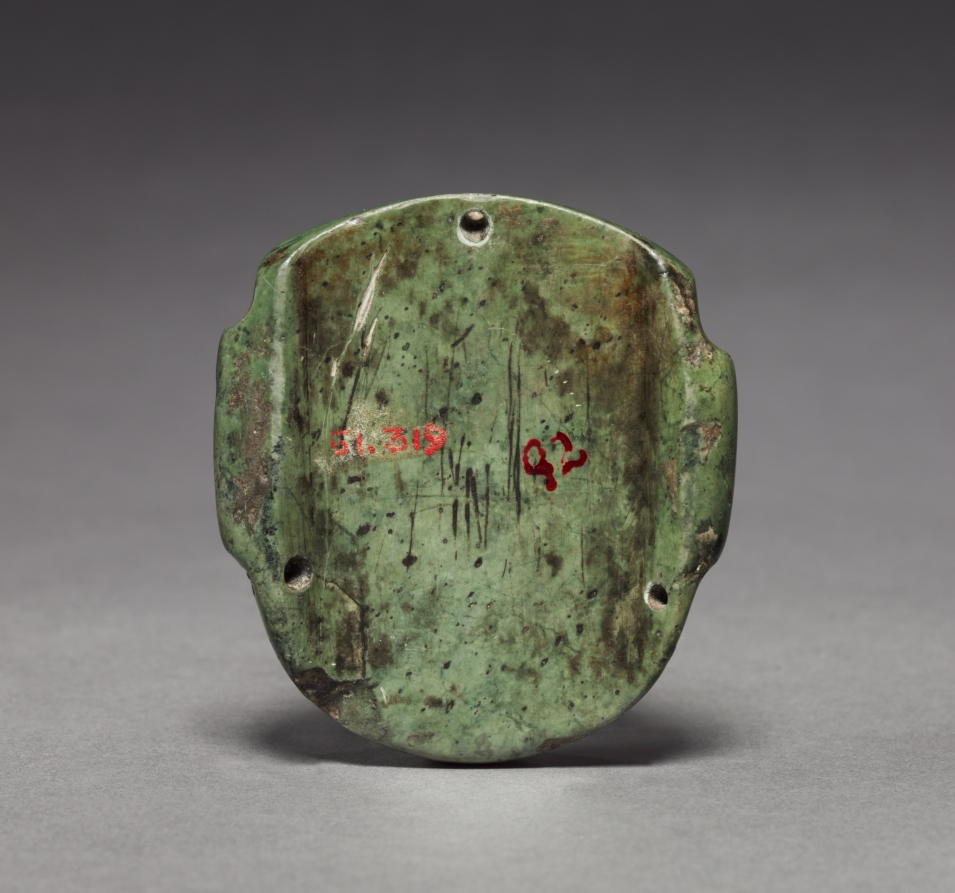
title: Miniature Mask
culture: Mesoamerica, Mexico, Olmec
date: c. 900–400 BCE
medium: greenstone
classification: Jade